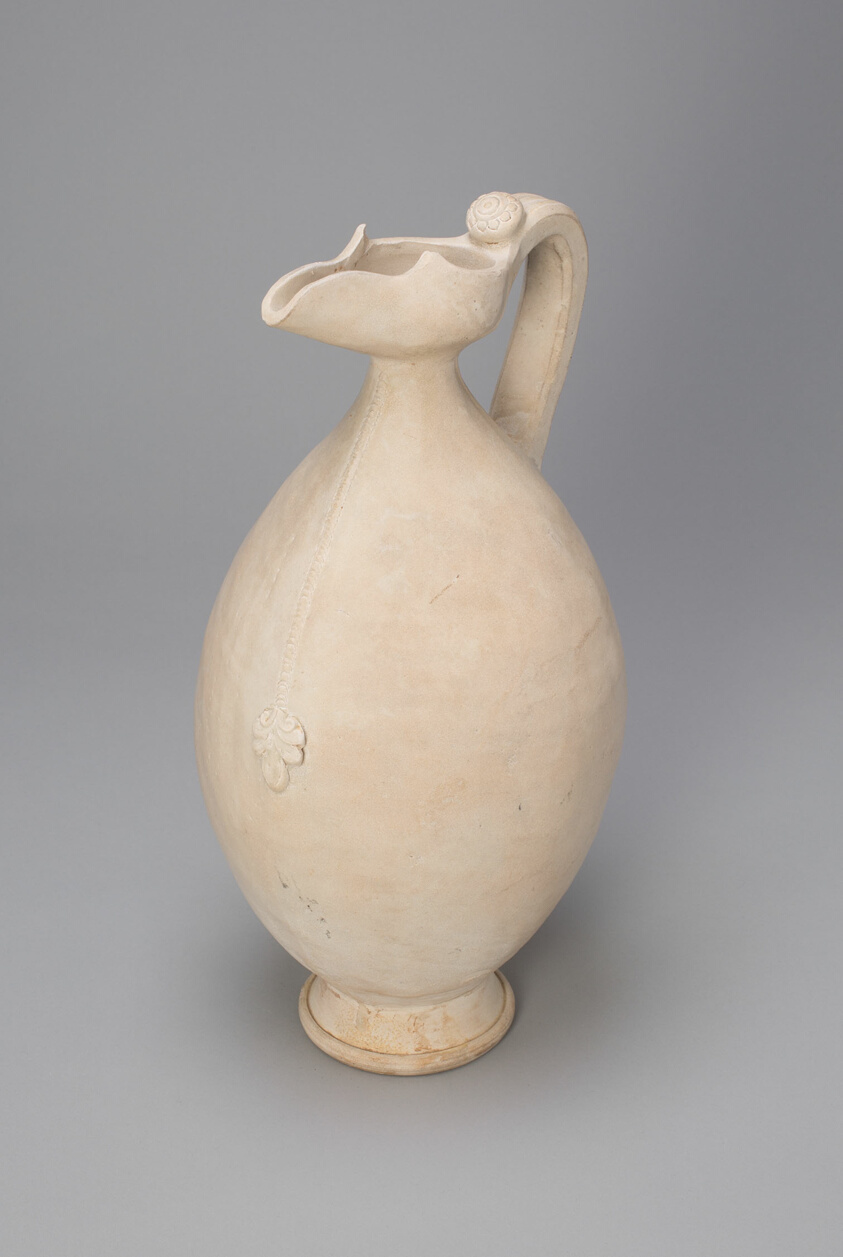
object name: Vessel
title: Ovoid Ewer with Flaring, Beak-Shaped Spout, Floral Medallion, and Zipper-like Band with Palmette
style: Chinese (culture or style)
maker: China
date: Tang dynasty (A.D. 618–907), 8th century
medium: Stoneware with underglaze molded and applied decoration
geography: China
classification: ewer (vessel); stoneware; vessel; asian art; ceramics